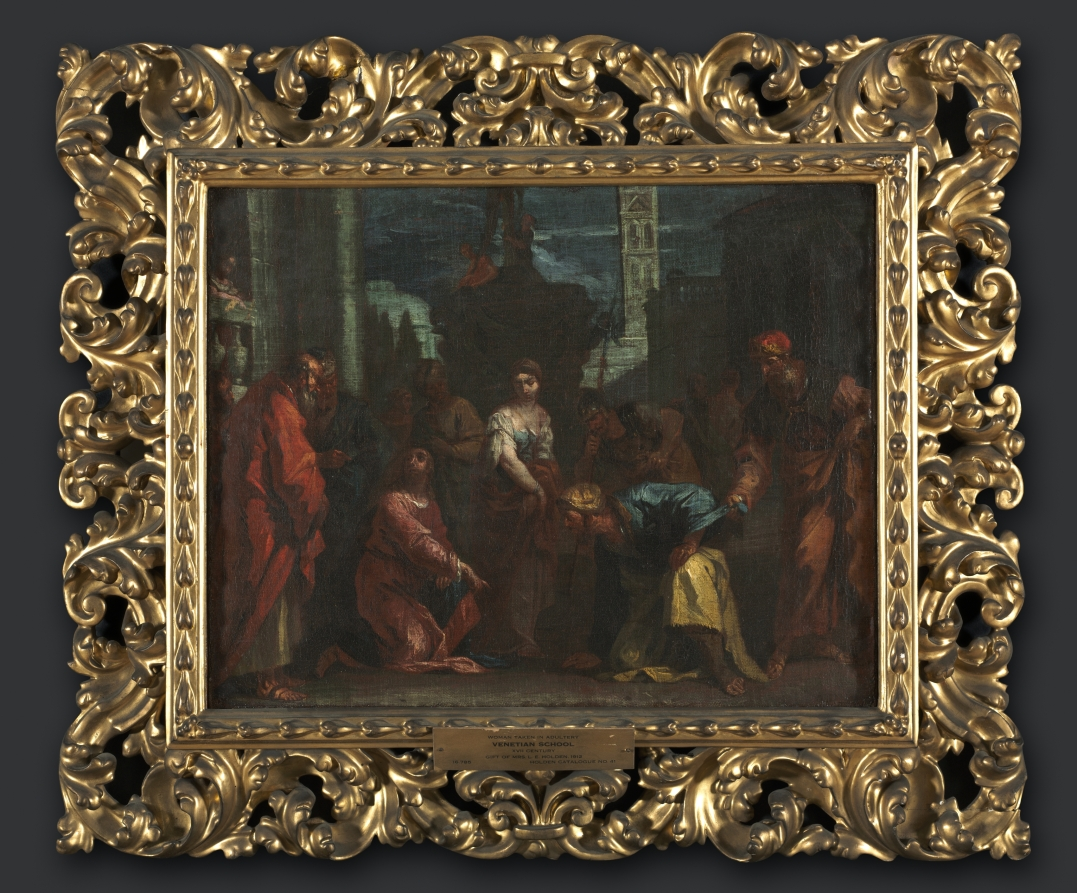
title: Christ and the Woman Taken in Adultery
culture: Italy, 18th century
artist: follower of Sebastiano Ricci (Italian, 1659–1734)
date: mid 1700s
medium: oil on canvas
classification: Painting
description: The subject originates in the Gospel of John 7:53-8:11, where Pharisees bring a woman accused of adultery to Christ, attempting to trick him into disobeying the Old Testament precept that she be stoned. In response, Christ interrupted his writing on the ground, stating: "Let anyone among you who is without sin be the first to throw a stone at her." The Pharisees, unable to retort, gradually disperse, and Christ eventually sends the woman away with an admonition not to sin again. The subject was popular in 18th-century Venice, partly because magnanimity was an important value, celebrated in visual, musical, and literary culture. The showy, exotic subject and the public presentation of an openly sexualized woman also enjoyed popularity in 18th-century Venetian painting. This work is a copy of the picture at the Minneapolis Institute of Arts, perhaps by a student (and certainly not by Ricci himself)